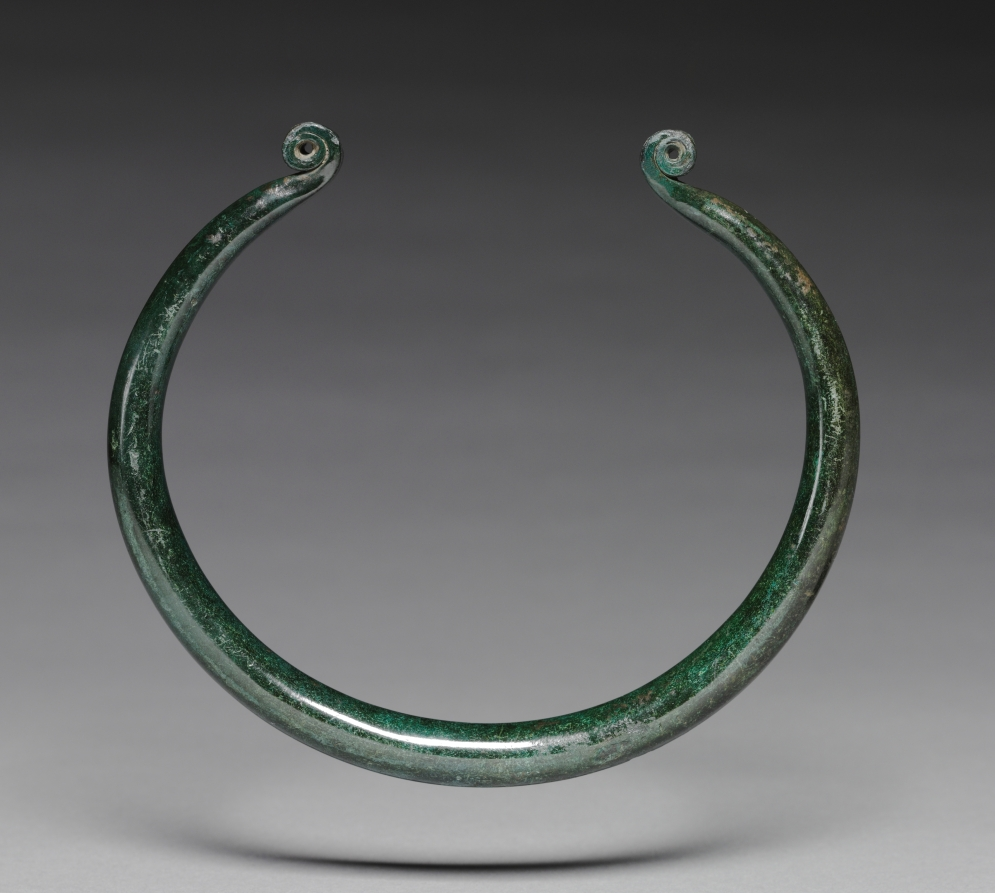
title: Ingot Torque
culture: Hungary, Bronze Age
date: c. 1500 BCE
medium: bronze, wrought bronze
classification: Metalwork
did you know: A torque is a neck ornament usually made of metal.